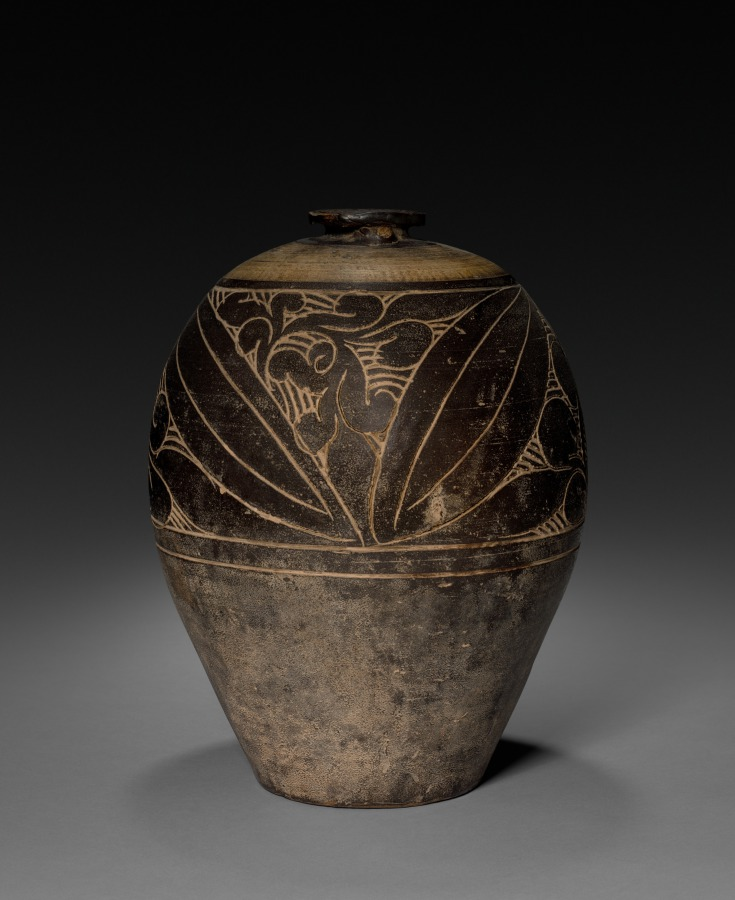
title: Jar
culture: China, Yuan dynasty (1271-1368)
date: 1271–1368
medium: glazed grayish-buff stoneware with incised decoration and underglaze slip application, Cizhou ware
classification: Ceramic